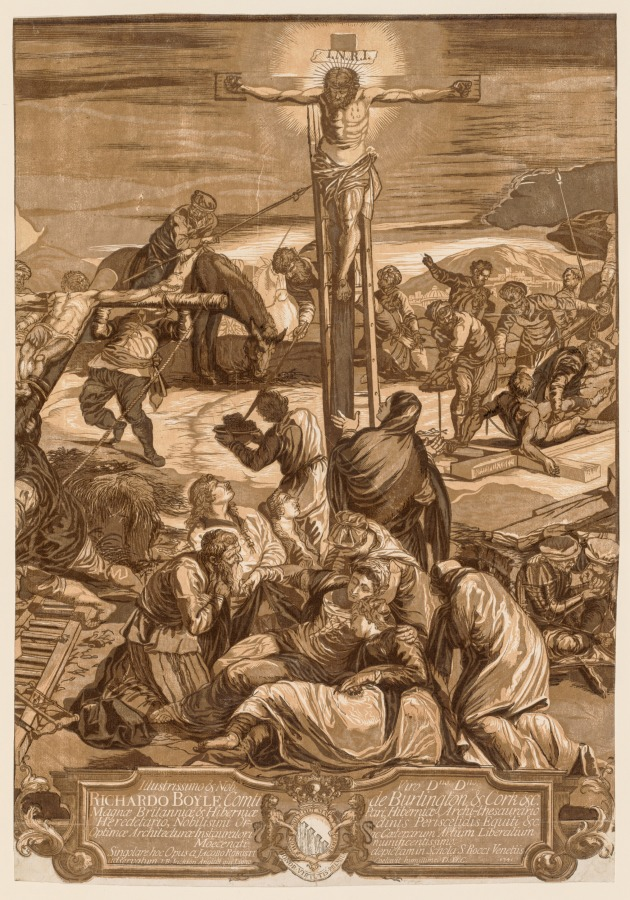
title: Crucifixion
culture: England, 18th century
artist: John Baptist Jackson (British, 1701-c. 1780)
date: 1741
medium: chiaroscuro woodcut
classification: Print